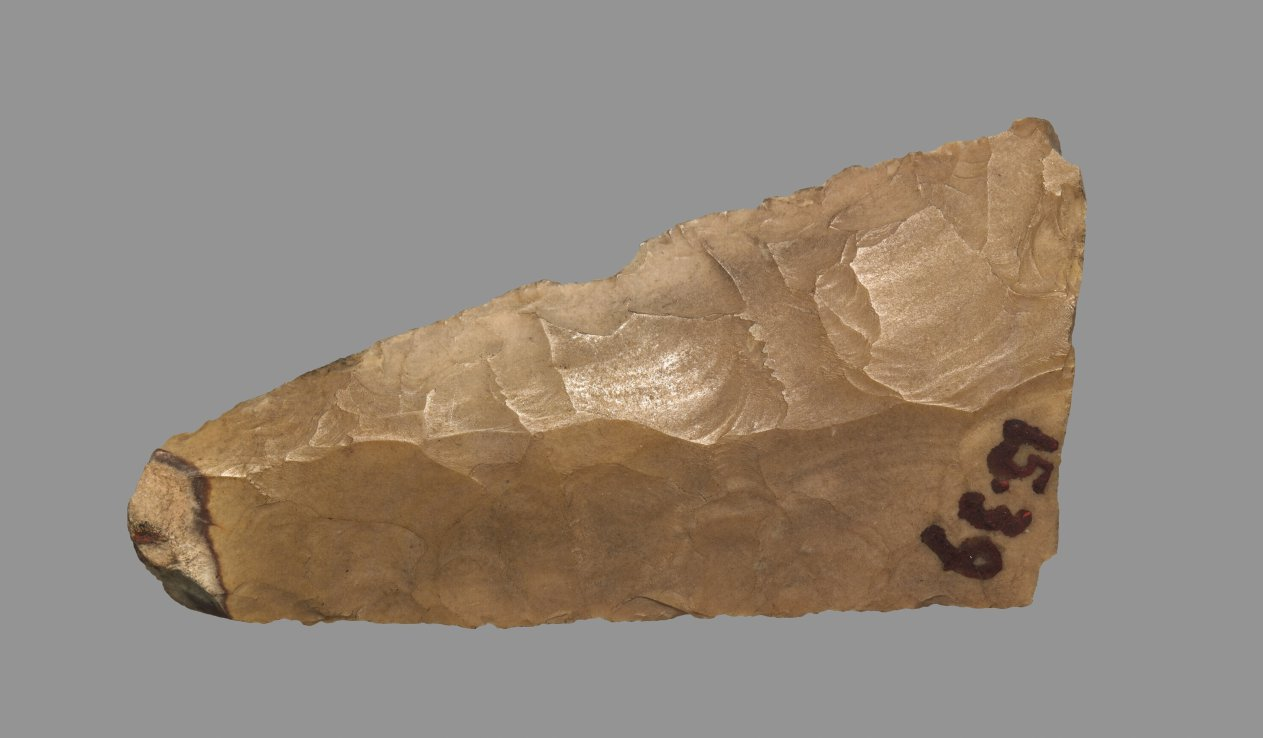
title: Hand Axe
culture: Egypt, Haraga, excavated in 1914, Predynastic (5000–2950 BCE)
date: 5000–3000 BCE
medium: tan-colored flint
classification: Implements